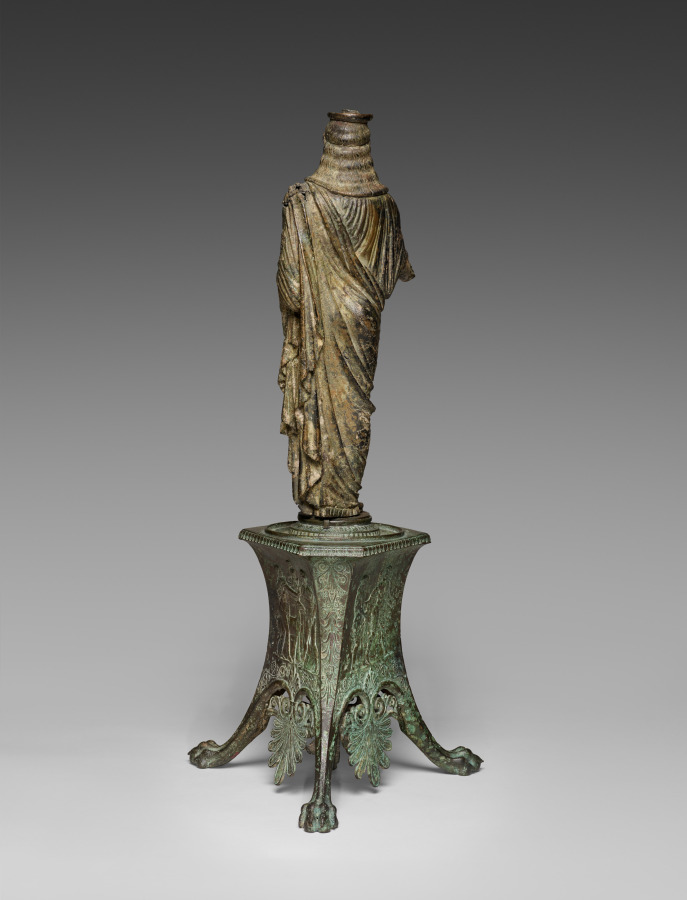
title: Statuette of Dionysos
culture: Italy, Roman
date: 50 BCE–50 CE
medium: bronze and silver and traces of gilding, hollow cast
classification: Sculpture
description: This bronze figure of Dionysos, the god of wine, theater, and the mysteries, is presented in a style recalling Archaic Greek art, most noticeably in his stiff pose and trimmed beard. The more naturalistic folds of his garment speak to a later date, in the Roman period. The disk attached at the top of the head suggests that this figure was once part of an ornate piece of furniture, perhaps a stand or support. In his right hand, the god likely held a kantharos or other attribute. He would have been further embellished with inlaid copper (lips), silver (whites of eyes), and perhaps gilding (garment).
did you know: Over his long, thin garment, Dionysos wears an animal skin, fastened on his left shoulder.